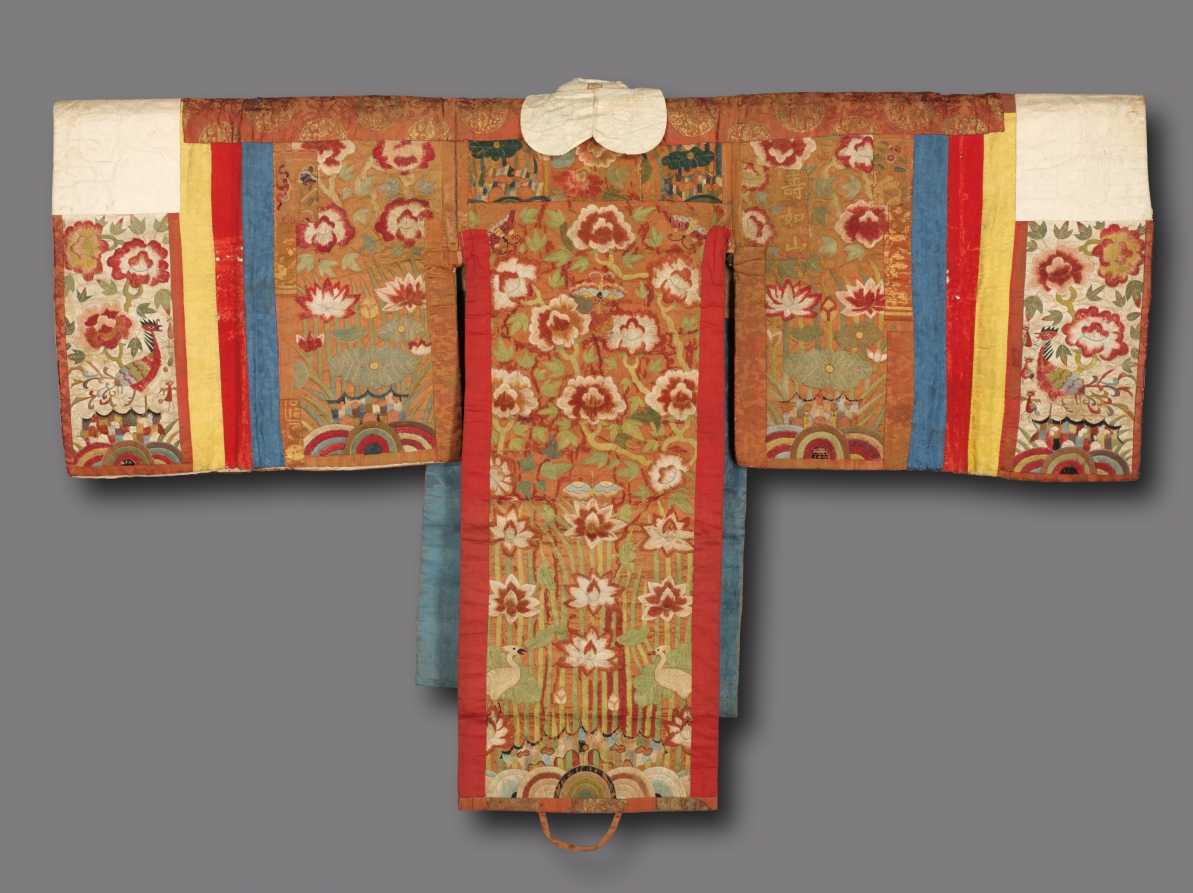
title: Bridal Robe (Hwarot)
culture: Korea, Joseon dynasty (1392–1910)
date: 1700s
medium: Satin weave silk; silk embroidery; paper edging on neck and sleeves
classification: Garment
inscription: [二姓]之合 / [百]福之源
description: This bride's robe is exquisitely embroidered with various symbols of happiness in colorful silk threads. Butterflies stand for marital happiness; the phoenix, numerous offspring; and lotus flowers and white cranes, longevity. Yet, the bridal robe does not attest to the life of luxury. To the contrary, many traces of repairs, trimmings, and patchwork reflect Joseon period women’s commitment to value neo-Confucian aesthetics of frugality and modesty. Substantial repairs and patching reveal that this robe served as an important communal resource to be shared and passed down through several generations. Its collar and sleeves are covered in thick white paper; this paper is replaced with new paper for each bride, while the robe itself was reused for decades.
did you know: This bride's robe was not made for one specific bride, but rather was shared and passed down to many brides.